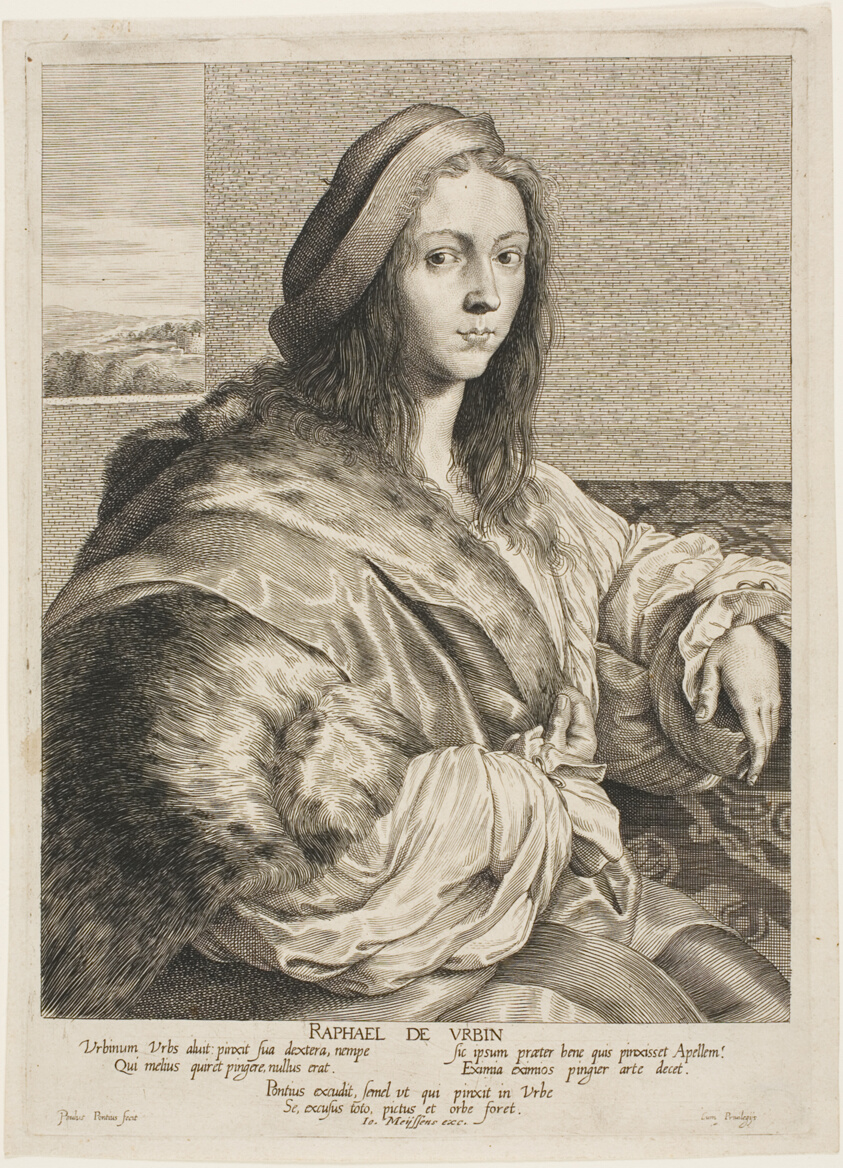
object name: Print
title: Portrait of Raphael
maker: Paul Pontius (Flemish, 1603-1658)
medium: Engraving on paper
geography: Flanders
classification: etching; print; prints and drawing